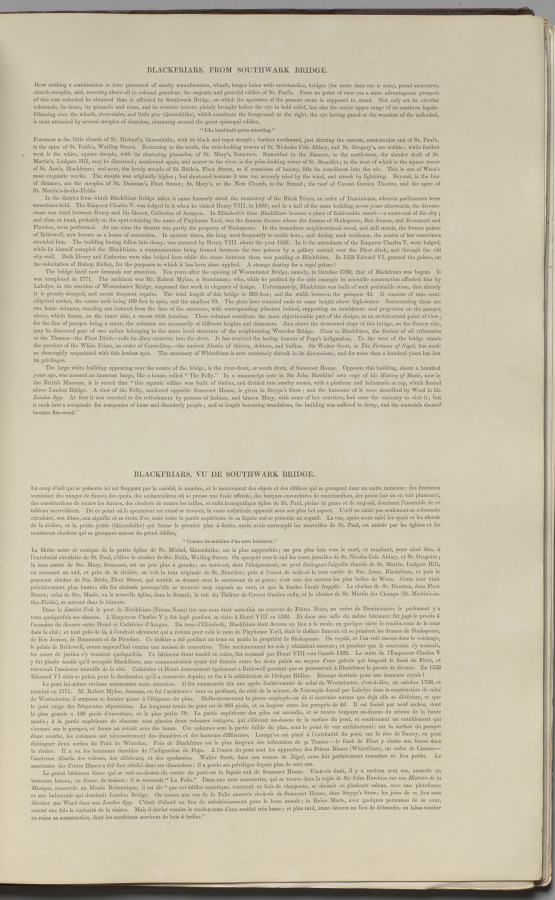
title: London As It Is: Blackfriars, from Southwark Bridge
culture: England, 19th century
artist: Thomas Shotter Boys (British, 1803–1874)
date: 1842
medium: lithograph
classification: Bound Volume